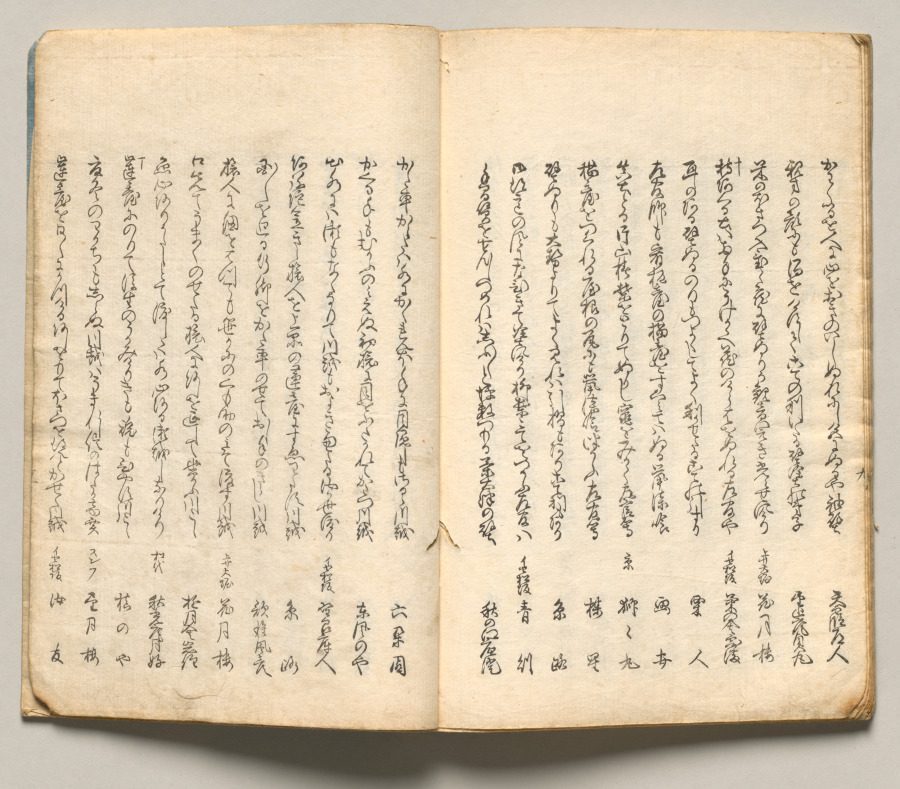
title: Spread Eighteen from Volume Seven of People of Japan in Light Verse (Kyōka)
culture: Japan, Edo period (1615–1868)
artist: Utagawa Hiroshige (Japanese, 1797–1858)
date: 1857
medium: Woodblock-printed book; ink and color on paper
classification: Bound Volume